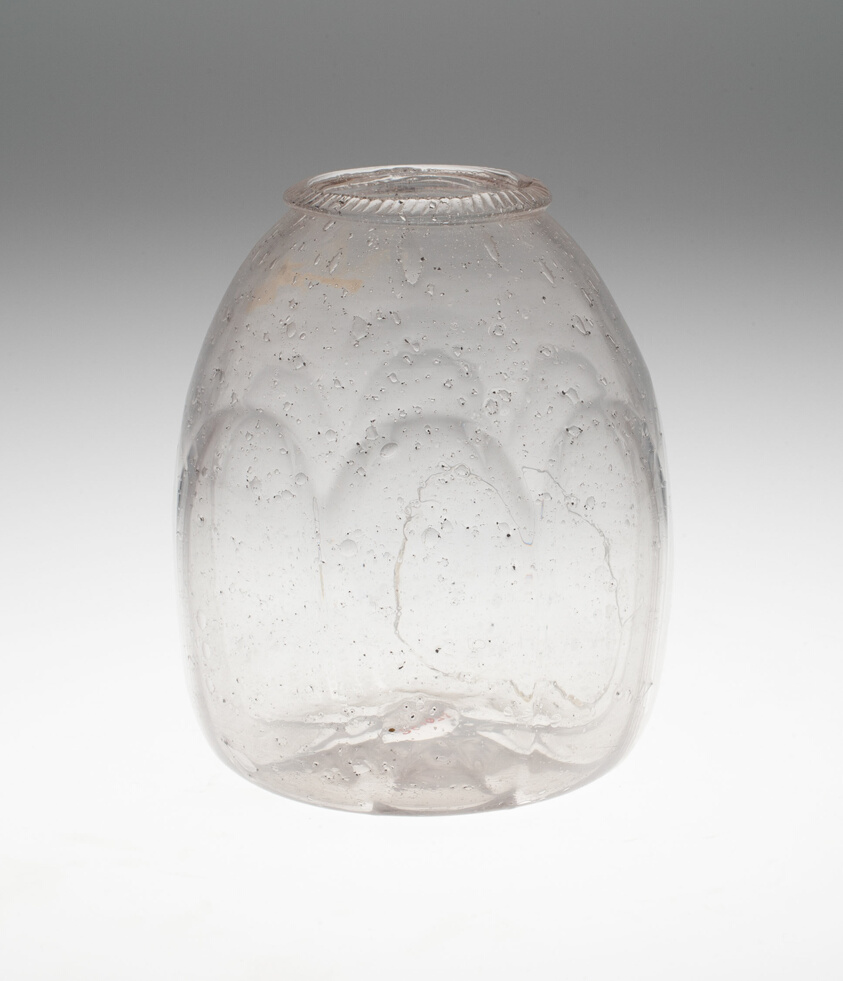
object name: Glass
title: Jar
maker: Spain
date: 16th to 17th century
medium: Glass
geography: Spain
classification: glass; european decorative arts